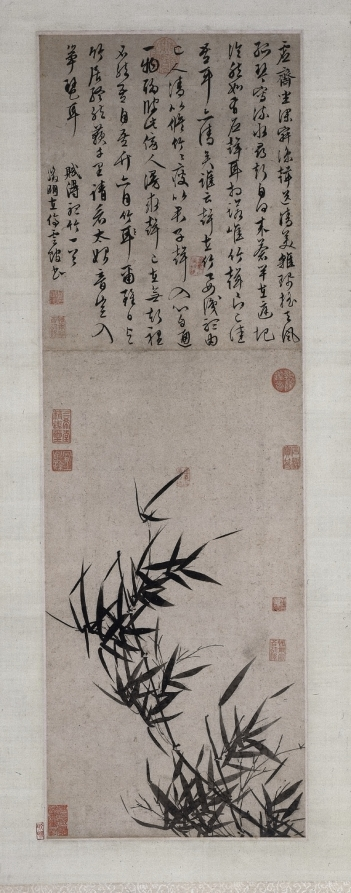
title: Listening to the Bamboo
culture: China, Ming dynasty (1368–1644)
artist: imitator of Wen Zhengming (Chinese, 1470–1559)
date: late 1400s-1500s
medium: hanging scroll, ink on sutra paper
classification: Painting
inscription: Artist's inscription, signature, and 2 seals on the separate sheet of paper above the painting: In the empty studio sitting in deep loneliness;/ Like cool sound sending pure beauty,/ Or pendants swinging in the wind,/ Or a solitary qin suggesting running water./ Where is that sound from?/ The green poles in the courtyard,/ Clear and light like an echo,/ The sound and ears are in tune./ The sound of bamboo now very beautiful;/ My ears are also clear./ Who says the sound is in the bamboo?/ To know it depends on oneself./ A noble person is like a tall bamboo;/ A thin bamboo is like the noble man./ When the sound enters, the mind responds,/ Only one thing but artificially separated./ A bystander searching for the sound,/ But the sound can only be found in silence./ Otherwise I am still I,/ Bamboo is still bamboo./ Even if I live with bamboo every day,/ Still the music will be a thousand miles away./ Look at sound's most primeval source:/ Did it enter a zither or a lute? Composing a poem on Listening to the Bamboo. Written by Zhengming at the Ting yun guan. Wen Zhengming [2 seals] Wen Zhengming yin 文徵明印; Wei geng yin wu yi jiang 惟庚寅吾以降.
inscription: [印] 文徵明印; 惟庚寅吾以降.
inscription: 5 seals of the Qianlong emperor (r. 1736-95)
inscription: [印] 金粟山藏經紙